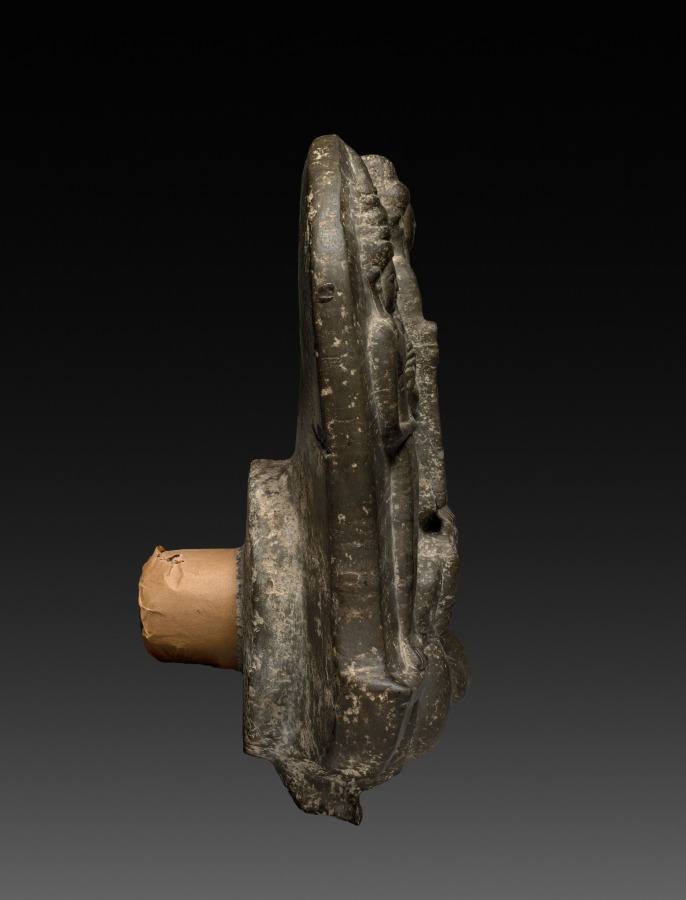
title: Bracket with Buddha and a Pair of Acolytes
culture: Thailand, Mon-Dvaravati style, probably from Nagara Pathama, 8th-9th Century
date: 700s–800s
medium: gray schist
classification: Sculpture